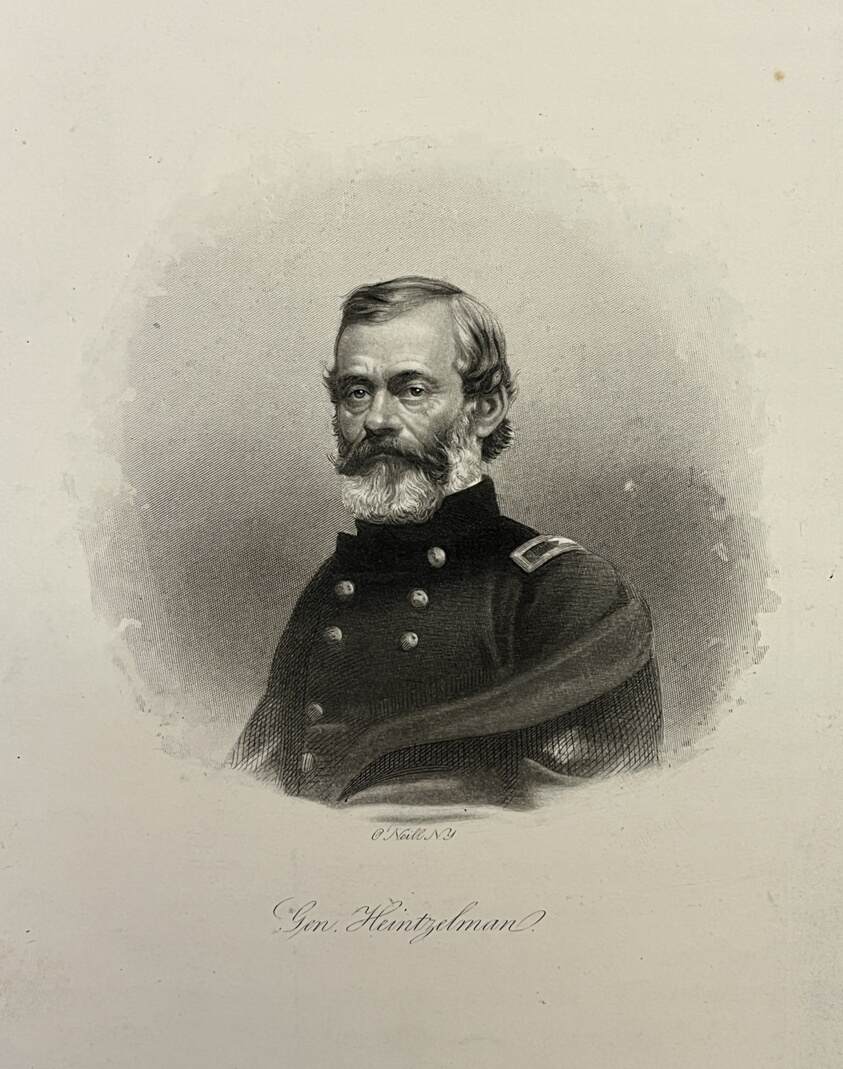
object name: Print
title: General Heintzelman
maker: Artist Unknown (Likely American, 19th century)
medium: Etching on paper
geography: United States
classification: reproduction; print; prints and drawing